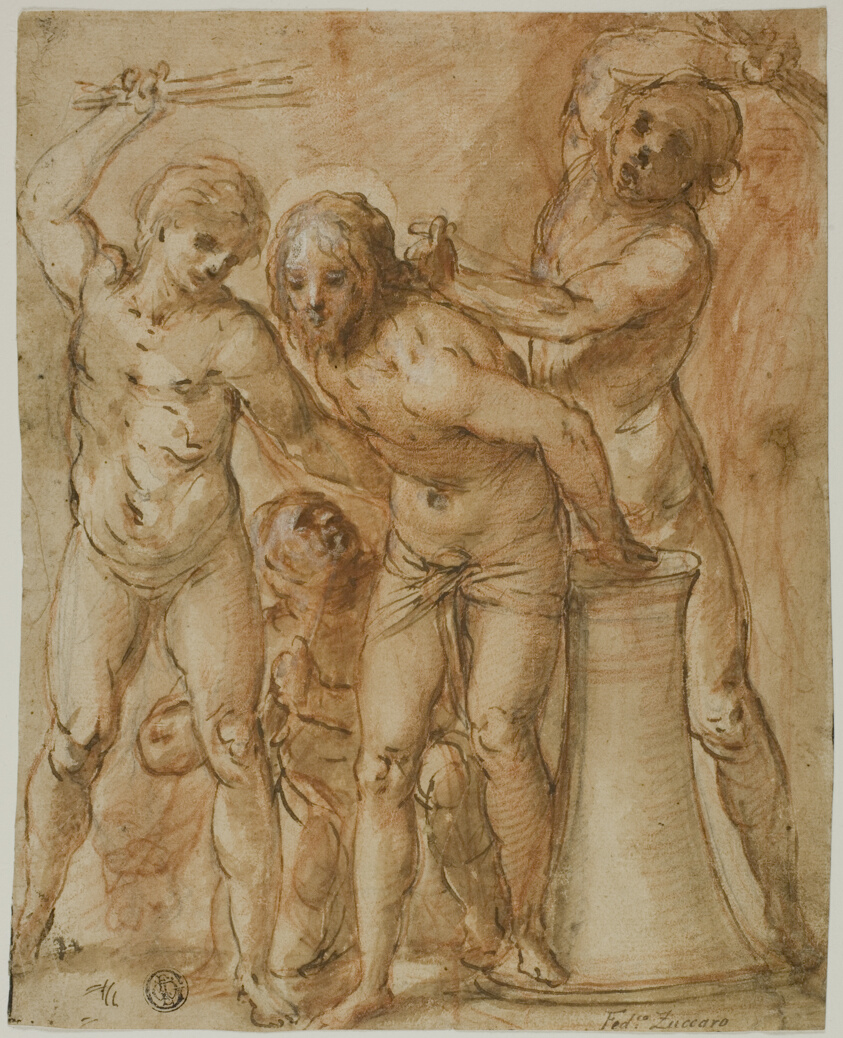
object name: Drawing and Watercolor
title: Flagellation of Christ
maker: Follower of Giuseppe Cesari, called Il Cavalier d'Arpino; Italian, 1568-1640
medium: Pen and brown ink with brush and brown wash and red chalk, heightened with white gouache, on ivory laid paper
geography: Italy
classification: pen and ink drawings; drawings (visual works); prints and drawing